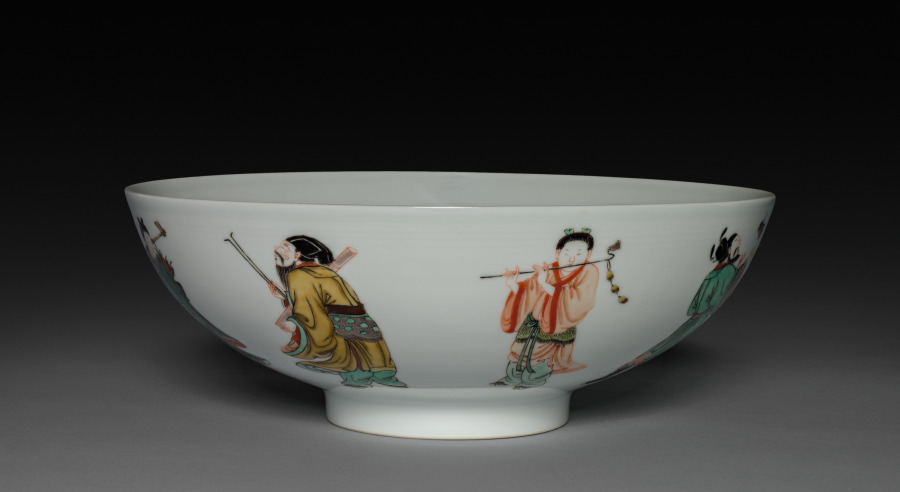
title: Bowl with Eight Immortals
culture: China, Jiangxi province, Jingdezhen kilns, Qing dynasty (1644-1911), Kangxi reign (1662-1722)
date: 1662–1722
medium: porcelain with famille verte overglaze enamel decoration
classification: Ceramic